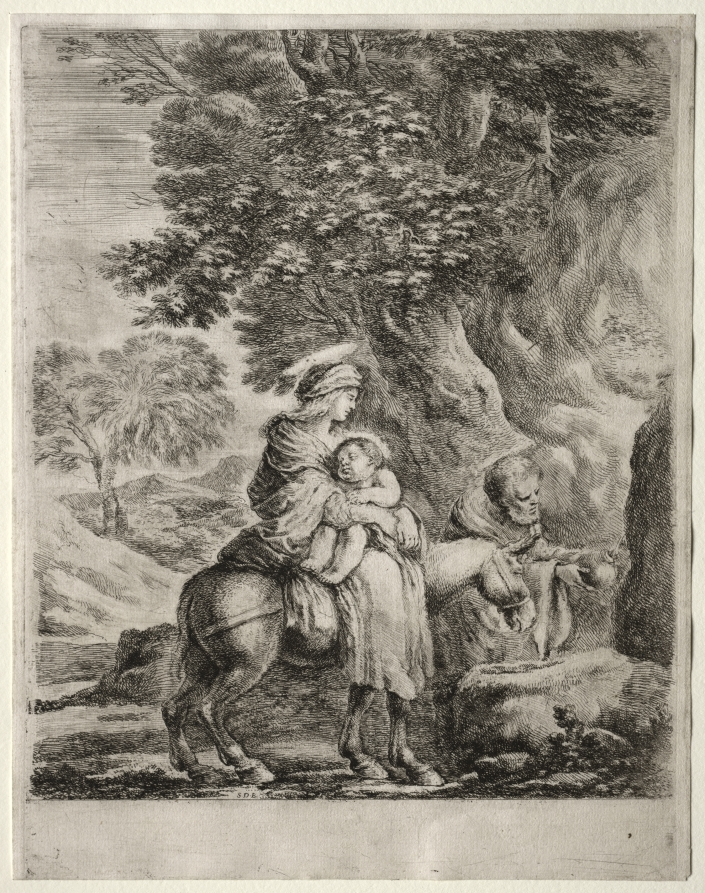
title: Flight into Egypt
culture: Italy, 17th century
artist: Stefano Della Bella (Italian, 1610–1664)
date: c. 1662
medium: etching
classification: Print